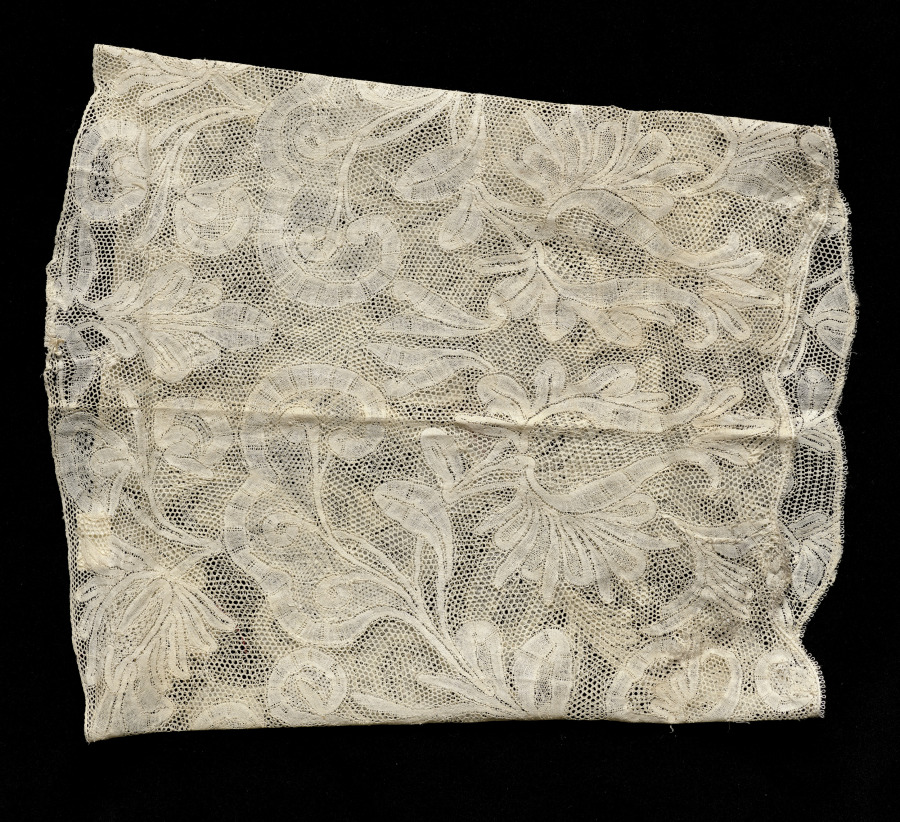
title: Lace Cuff (one of a pair)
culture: Italy, Milan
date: 1700s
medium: Linen: bobbin lace with Mechelen ground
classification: Lace